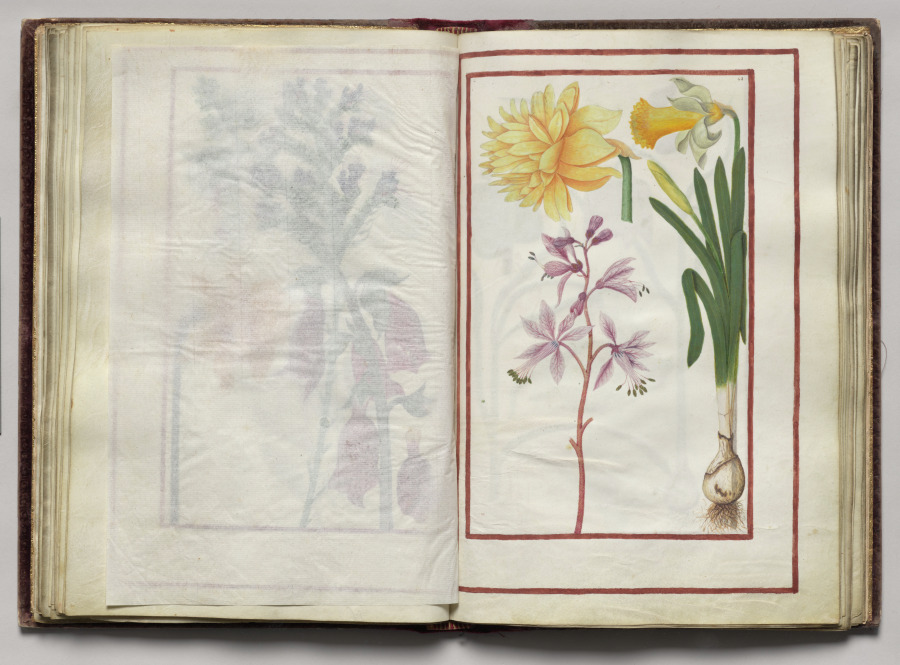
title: Florilegium (A Book of Flower Studies)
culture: France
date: 1608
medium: bound manuscript of 48 leaves, 77 drawings; watercolor, ink, silver, and gold over occasional traces of pencil, on vellum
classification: Bound Volume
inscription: Dated: Poitiers 1608 (on frontispiece) Signed: On frontispiece in black ink, lower right: Van Kuyk Notation on drawing: Frontispiece: in pencil, lower margin: * élève de Van Kessel, peintre flammand (* in pencil also appears in front of Van Kuyk's name).